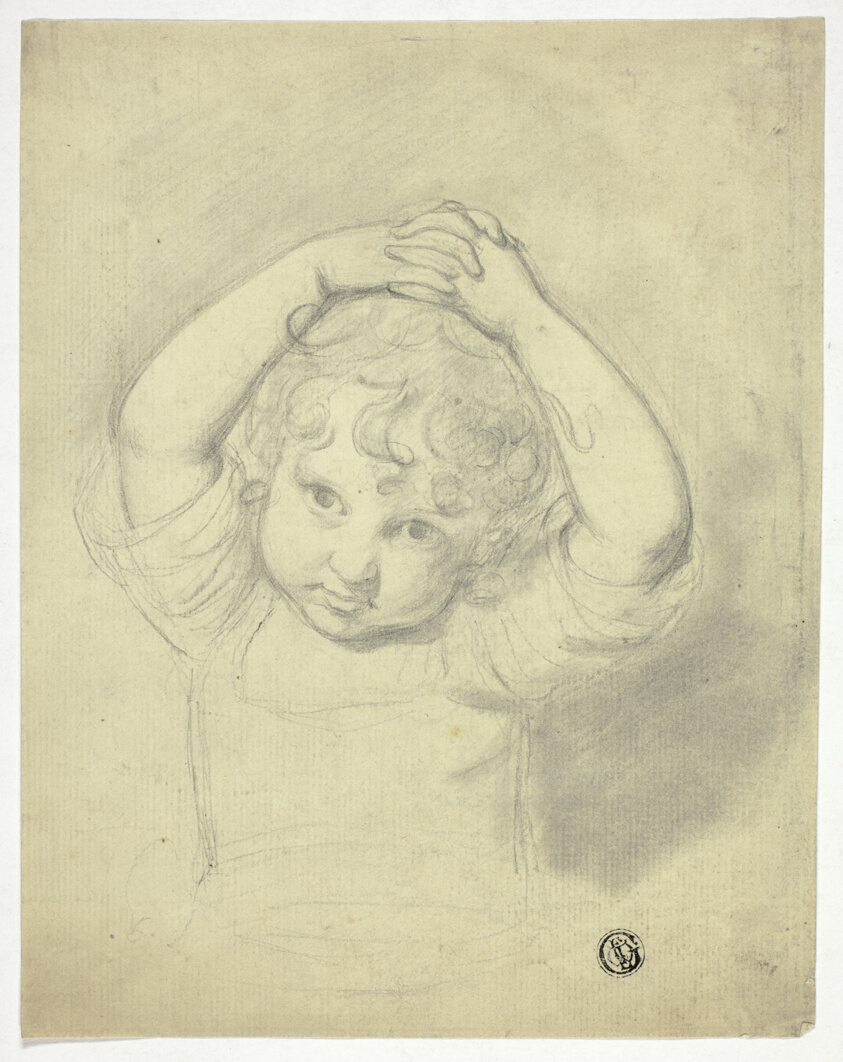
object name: Drawing and Watercolor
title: Child Holding Hands above Head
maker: Possibly Samuel De Wilde (English, 1748-1832); or style of John Downman (English, 1750-1824)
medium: Black chalk with stumping on ivory laid paper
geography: England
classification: chalk; drawings (visual works); prints and drawing; paper